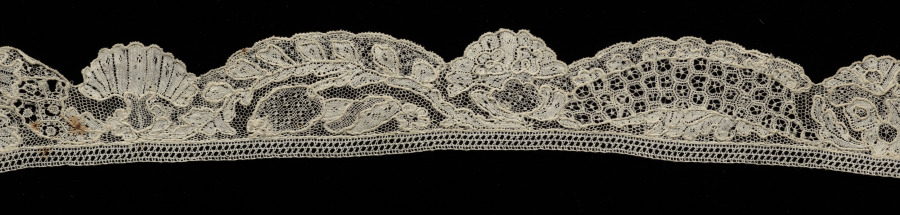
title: Lace Edging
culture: Italy(?), Burano(?)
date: 1700–1740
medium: Needle lace (Burano Point)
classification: Lace